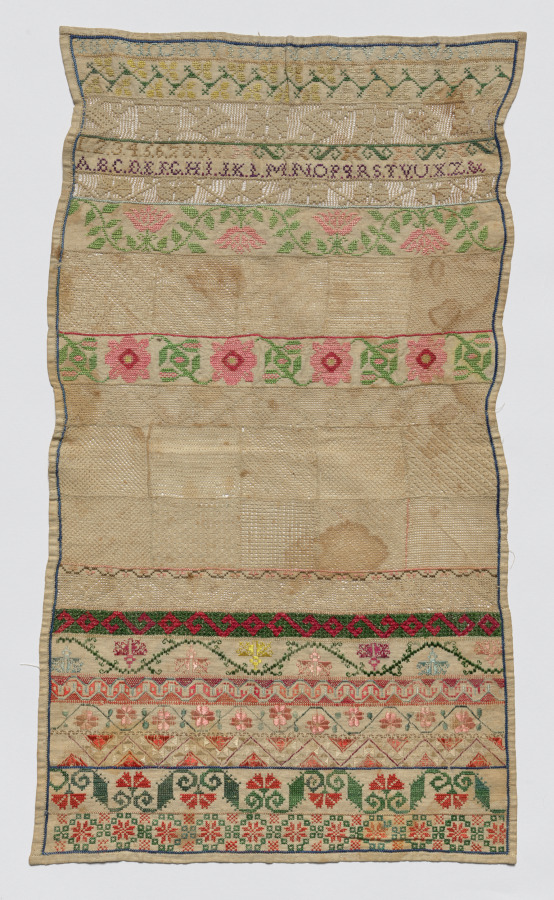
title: Sampler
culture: Mexico, 19th century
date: 1800s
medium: embroidery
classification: Sampler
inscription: at top, "MARGARYTA LOJEROENLA SCHOOL DE -----" and a row of numerals and alphabet.